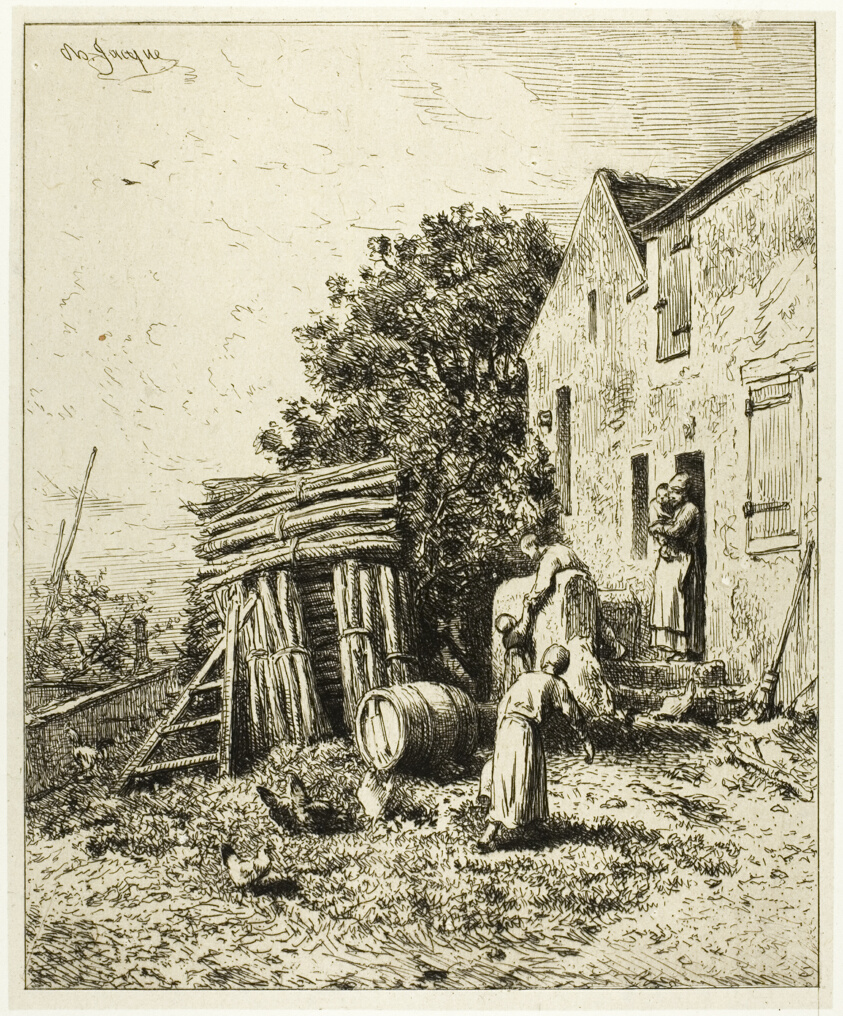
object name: Print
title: A Rustic Dwelling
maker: Charles Émile Jacque (French, 1813-1894)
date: c. 1865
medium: Etching on light gray China paper laid down on ivory wove paper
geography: France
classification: etching; print; prints and drawing